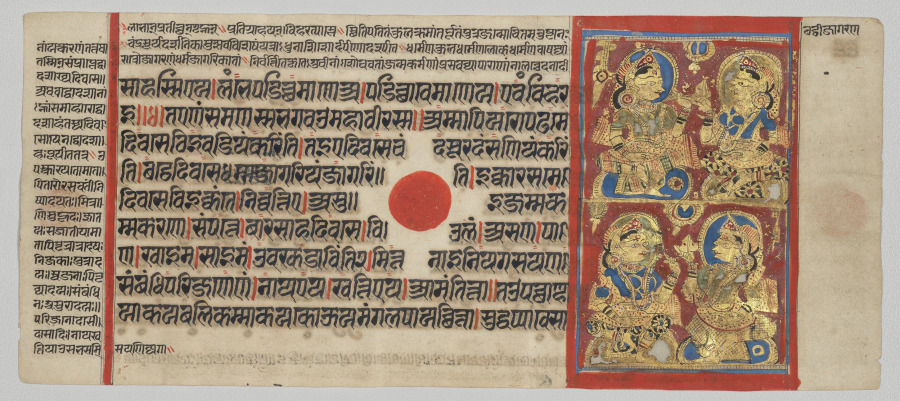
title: Vigil on the Sixth Night After Mahavira's Birth, Folio 33 (recto), from a Kalpa-sutra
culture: Western India, Gujarat, last quarter of the 15th century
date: c. 1475–1500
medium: Gum tempera, ink, and gold on paper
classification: Painting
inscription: [[upper right]] chatṭhī jāgaraṇa